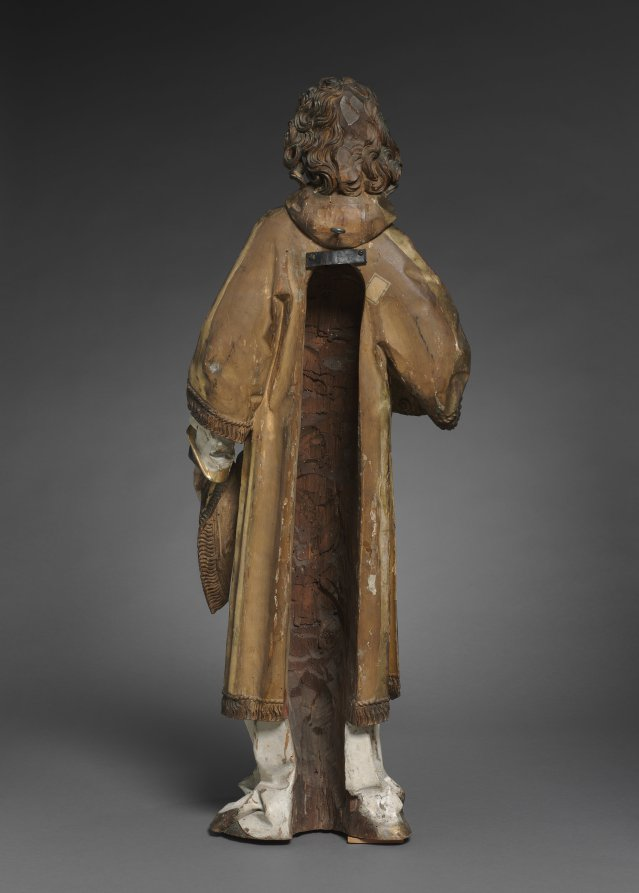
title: Saint Stephen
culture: Germany, Würzburg, 16th century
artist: Tilman Riemenschneider (German, active Würzburg, c. 1460–1531)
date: 1502–8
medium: lindenwood with polychromy and gilding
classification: Sculpture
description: This sculpture, along with that of Saint Lawrence (1959.42) and two others in Germany, are believed to be the remaining fragments of a large altarpiece carved by Riemenschneider for the Dominican convent in Rothenburg in Franconia (demolished in 1813). Saints Stephen and Lawrence both wear the dalmatic to indicate their status as deacons in the early church. Each holds a symbol of his martyrdom; here, Saint Stephen cradles some stones to indicate his death by stoning. Art in Germany through the early 1500s remained firmly anchored in the late Gothic style with its associated interests in realism. Riemenschneider was one of the most prolific and versatile sculptors of this style, a recognized master in both stone and wood. His flourishing workshop employed as many as 40 apprentices in sculpting, woodcarving, and painting. His sculptures are noted for the dreamy, melancholy, and introspective quality in their expressions, as well as their remarkable attention to detail.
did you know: Tilman Riemenschneider (c. 1460–1531) is probably the most famous German sculptor of the period around 1500.